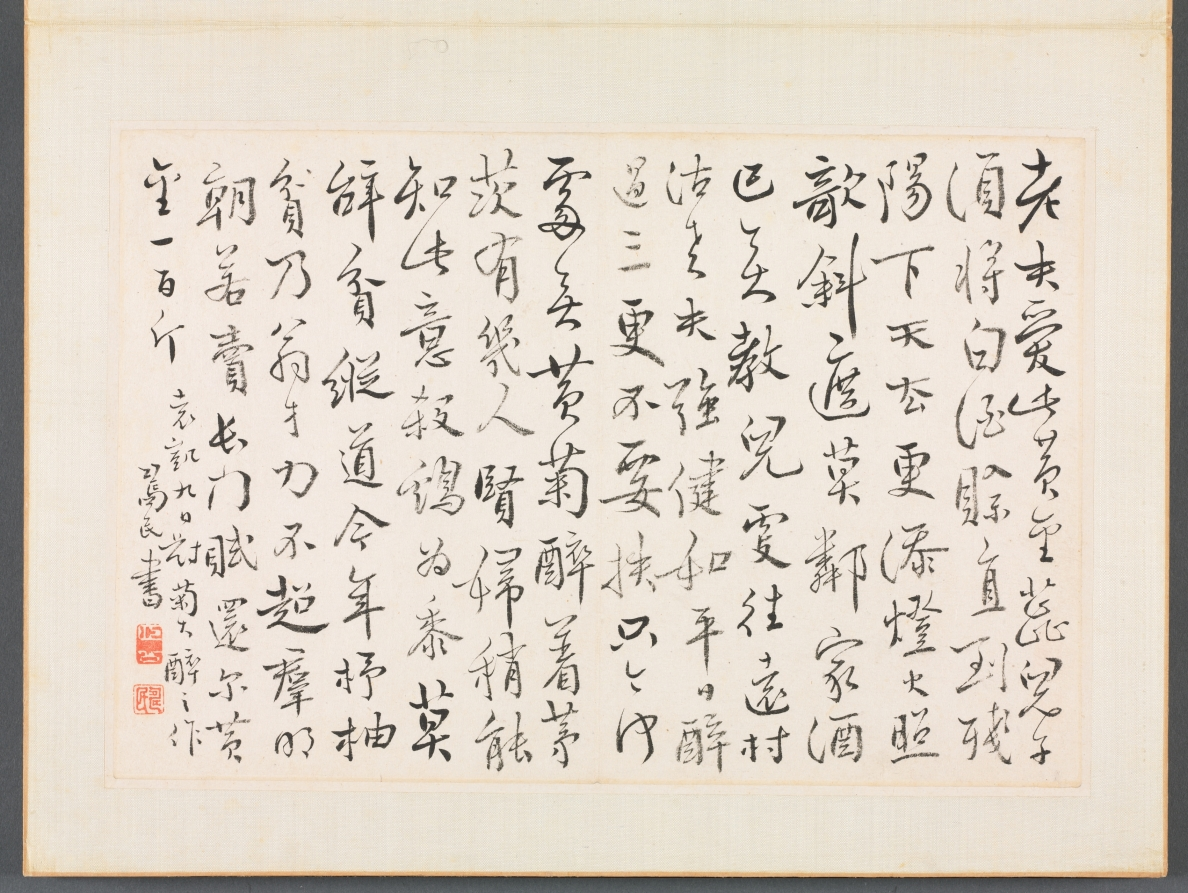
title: Album of Calligraphy and Paintings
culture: China, Qing dynasty (1644-1911)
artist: Bian Shoumin (Chinese, 1684–1752)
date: first half of the 1700s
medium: album leaf; ink and color on paper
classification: Painting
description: The artist Bian Shoumin is known for his depiction of wild geese, water, and reeds. The migrant birds in autumn and winter evoked, in the minds of the Chinese intelligentsia, a time of parting and sorrow.